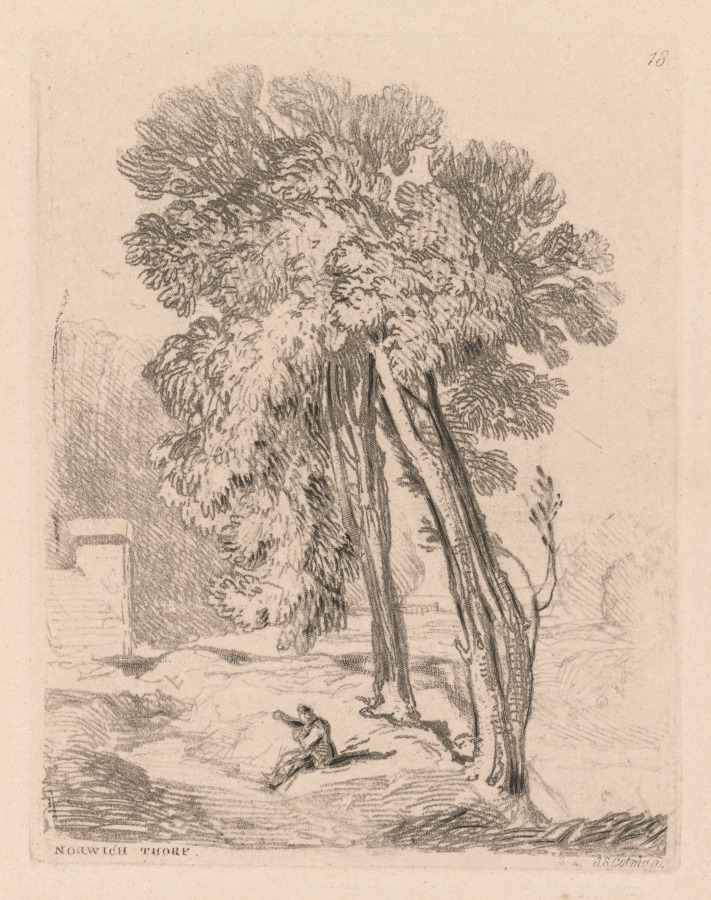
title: Liber Studiorum: Plate 18, Trees at Norwich Thorp, Norfolk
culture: England, 19th century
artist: John Sell Cotman (British, 1782–1842)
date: 1838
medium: softground etching, from a bound volume containing 48 plates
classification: Bound Volume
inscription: In plate, within image, upper right: 18; in plate, lower left, below image: NORWICH THORP; in plate, lower right, below image: J. S Cotman